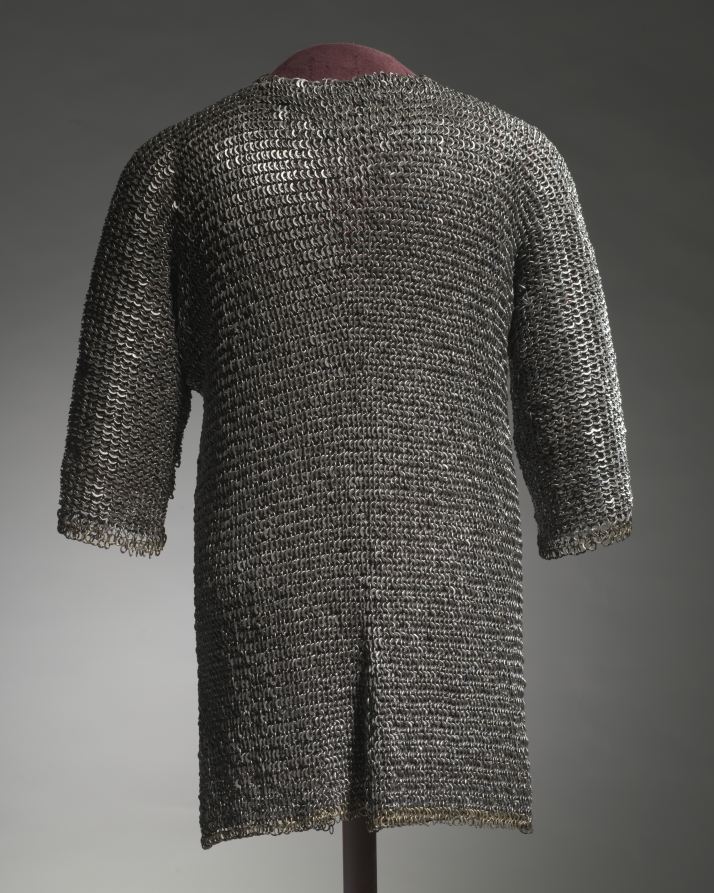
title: Hauberk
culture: Germany (?)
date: c. 1400–1450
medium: steel and brass rings, riveted with modern buckles and straps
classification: Arms and Armor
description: Mail armor was the predominant form of metal body defense for European knights until about 1350. The term derives from the Old French word maille (mesh), implying a protective textile. Each mail garment was constructed of small linked metal rings and "woven" for a specific part of the body. Mail for the torso is a hauberk and typically reached mid-thigh.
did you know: Mail was expensive to make and generally only available to warriors of noble birth unless it could be obtained as war booty.